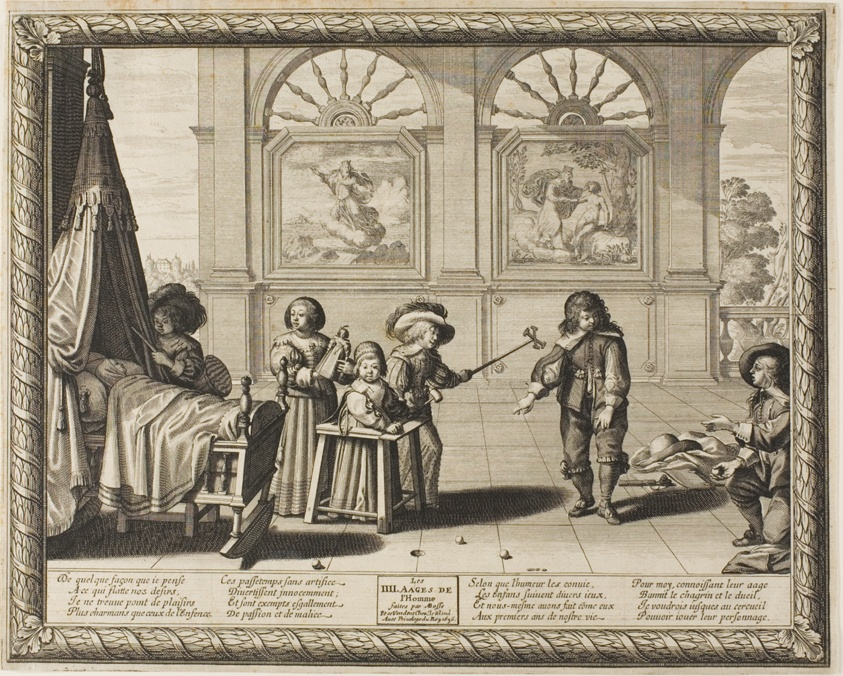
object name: Print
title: Childhood: Depicting the Four Ages of Man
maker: Abraham Bosse (French, 1602-1676)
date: 1636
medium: Etching on paper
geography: France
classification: etching; print; prints and drawing